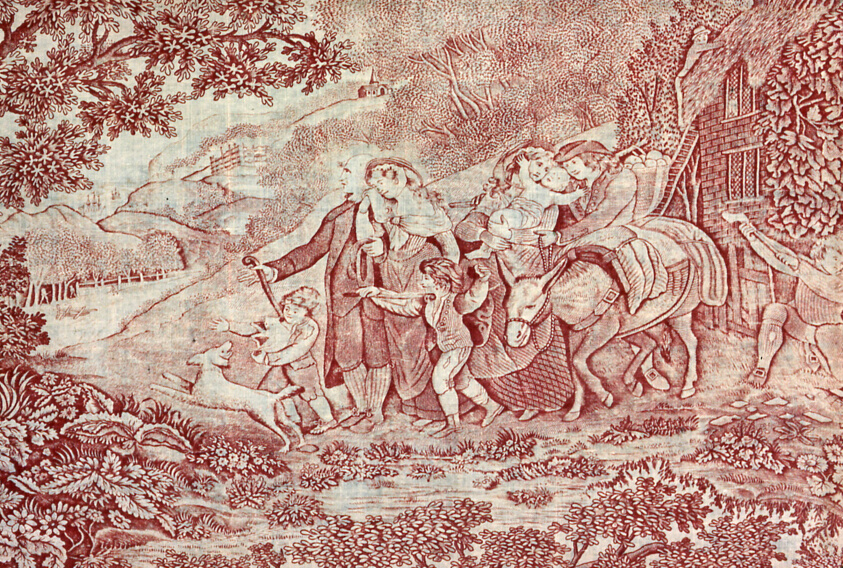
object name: Textile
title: The Dance and The Departure Illustrations from The Deserted Village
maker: After poem by Oliver Goldsmith (English, 1728- 1774) After Engraving by John Keyse Sherwin (English, c. 1751-1790); England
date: 1790/1800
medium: Cotton, plain weave; copperplate printed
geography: England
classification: textile; weaving - printed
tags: propaganda, coat of arms, royalty